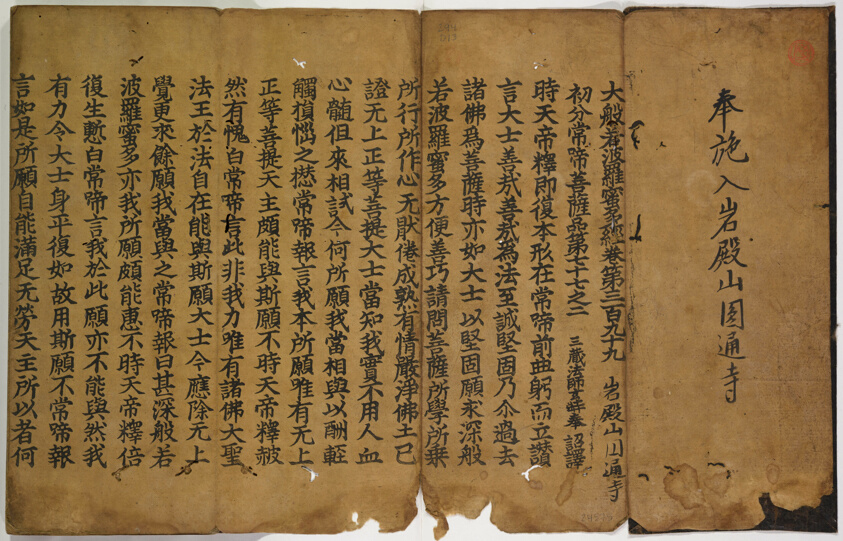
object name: Book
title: Book 399 of Buddhist Scripture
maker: Artist unknown, Japanese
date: 1383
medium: Woodblock-printed book(s)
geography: Japan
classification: book